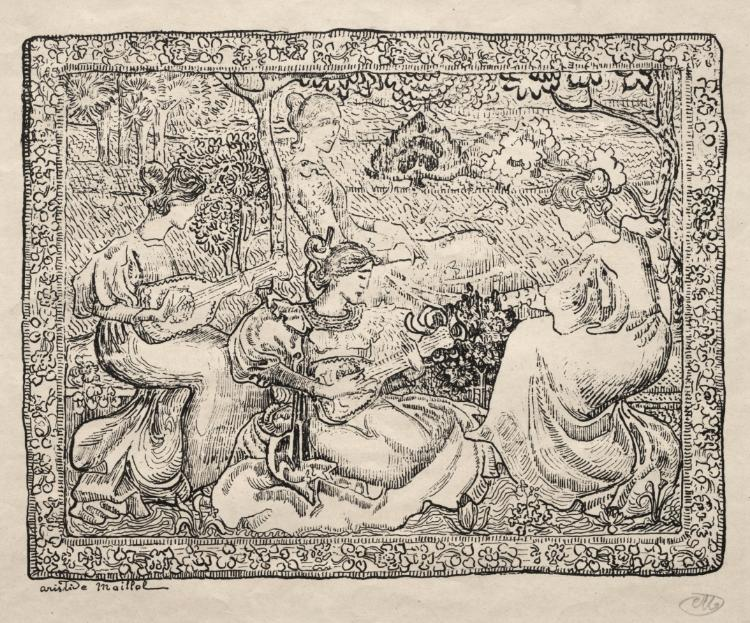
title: Music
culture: France, 20th century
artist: Aristide Maillol (French, 1861–1944)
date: c. 1893–1941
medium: lithograph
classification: Print